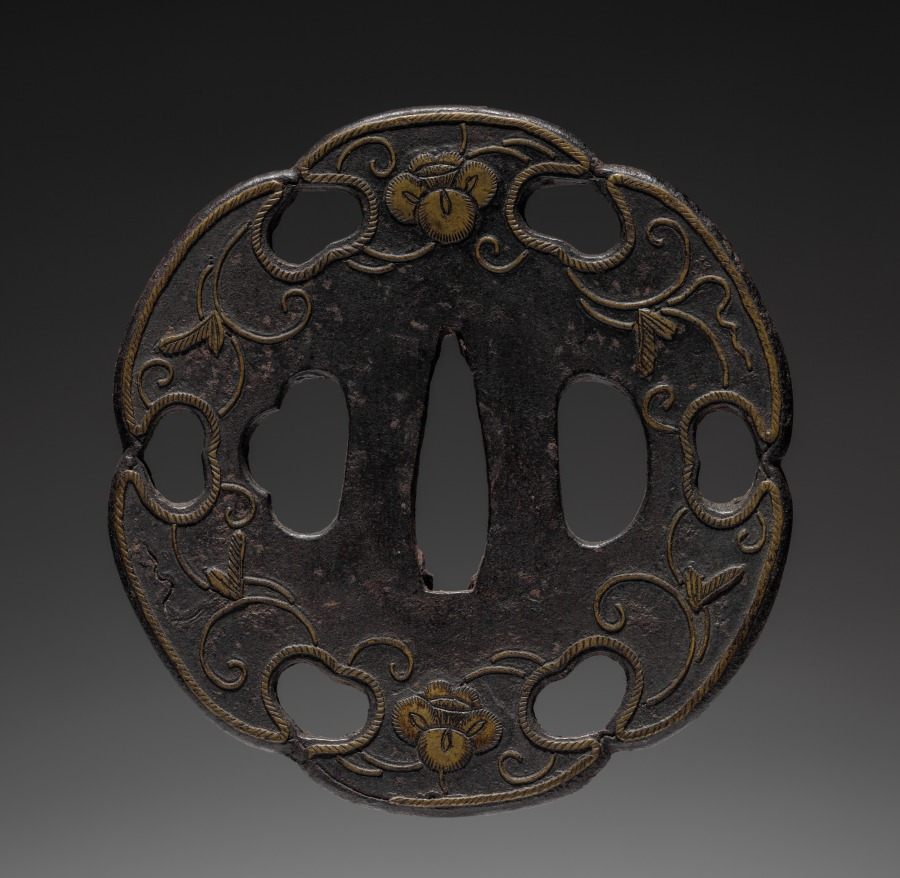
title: Sword Guard (Tsuba)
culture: Japan, possibly Edo period (1615-1868)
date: c. 1615–1868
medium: iron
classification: Arms and Armor